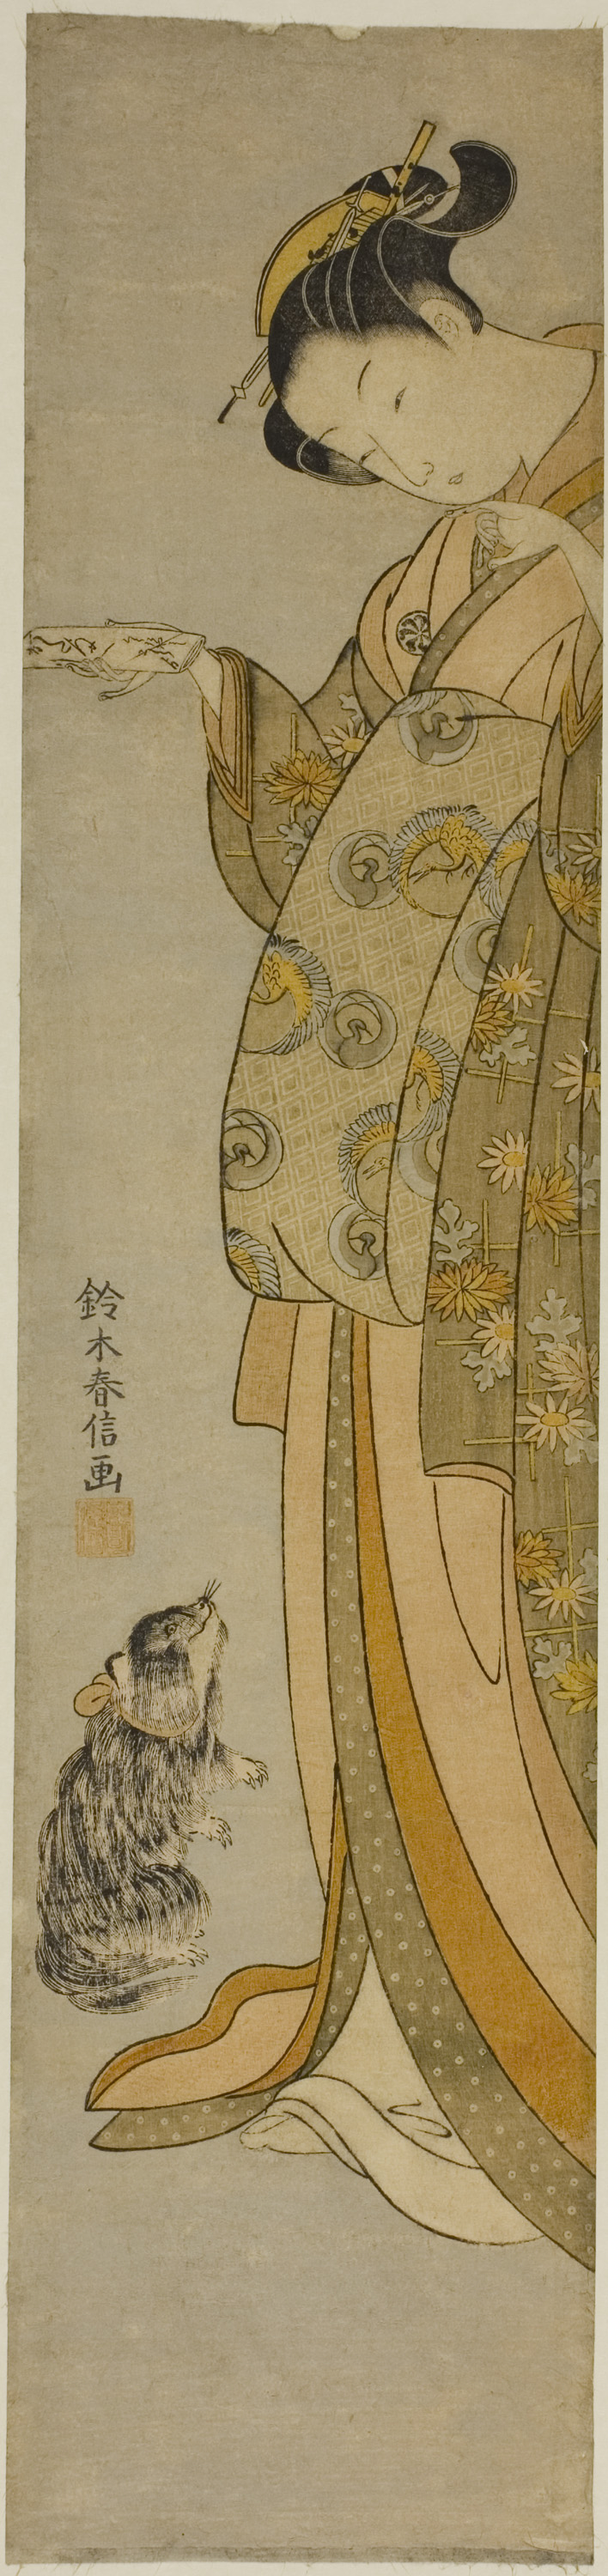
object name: Print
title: Courtesan with her Pet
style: Japanese (culture or style)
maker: Suzuki Harunobu 鈴木 春信; Japanese, 1725 (?)-1770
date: c. 1769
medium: Color woodblock print; hashira-e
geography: Japan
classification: woodblock print; print; asian art